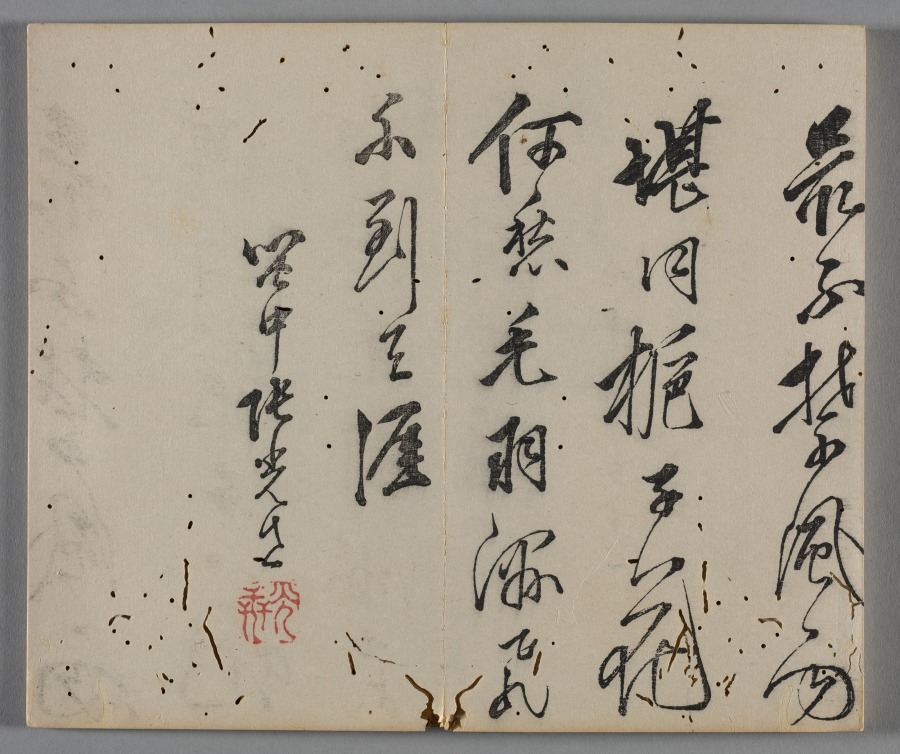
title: Ten Bamboo Studio Painting and Calligraphy Handbook (Shizhuzhai shuhua pu): Birds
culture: China, Qing dynasty (1644-1911)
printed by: Hu Zhengyan (Chinese, c. 1584–1674)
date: 1633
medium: Woodblock-printed book; ink and colors on paper; first edition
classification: Print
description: Color printing reached a level of perfection in the early 1600s, as seen in this Ten Bamboo Studio Collection of Calligraphy and Painting and the Mustard Seed Garden Manual of Painting (printed 1679 and 1701). The painterly quality, precision in registering (aligning) the woodblocks, and harmonious colors made them the most successful color print editions in Chinese history. Both editions were printed and compiled in Nanjing, spread nationwide, and had a great impact on the arts in Japan and Korea.